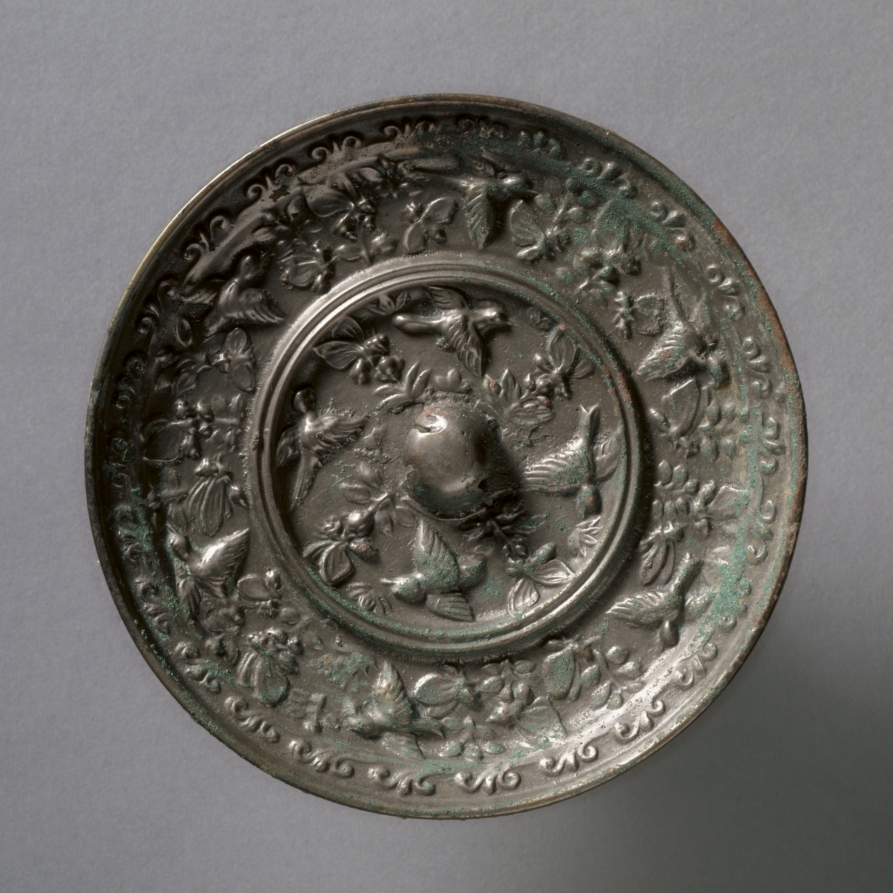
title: Mirror with Sparrows and Floral Sprays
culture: China, Tang dynasty (618-907)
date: late 600s-early 700s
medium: bronze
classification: Metalwork